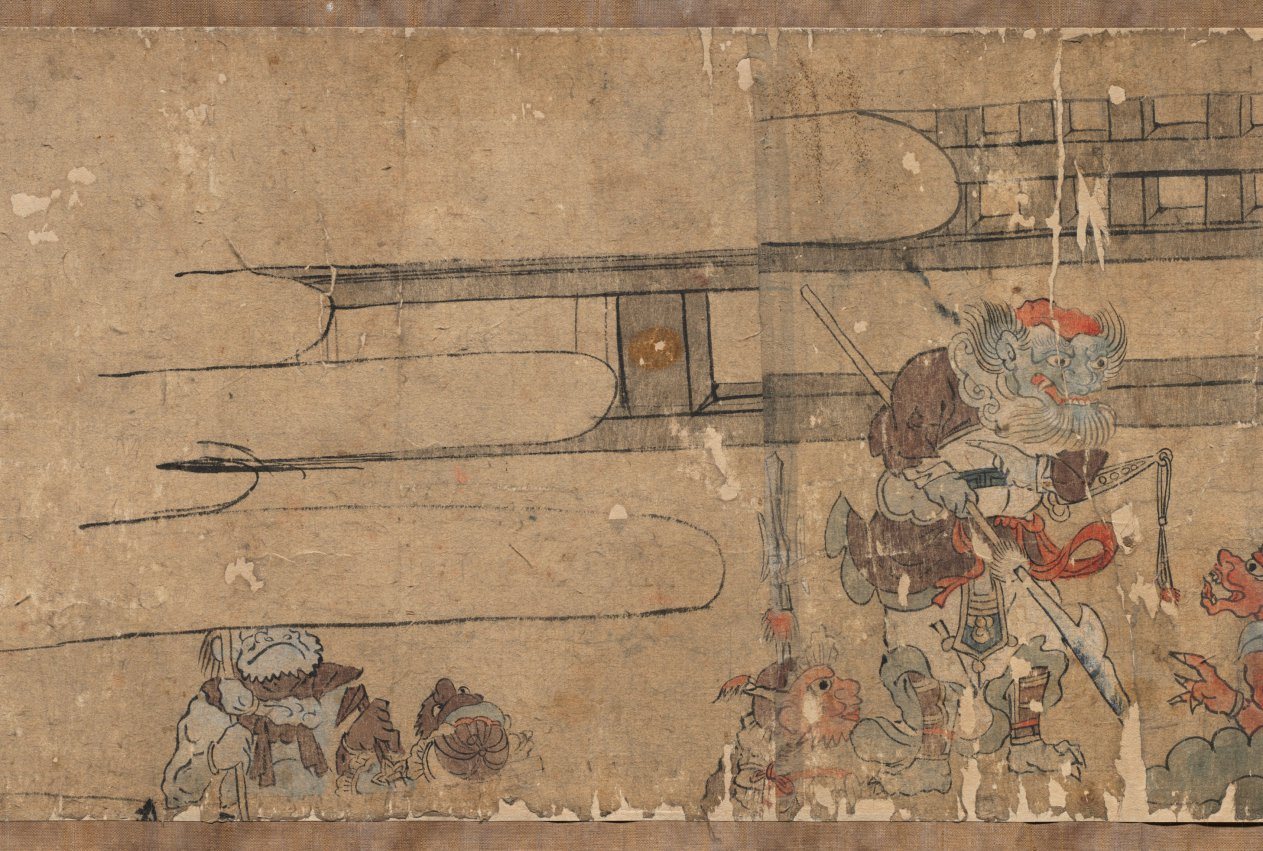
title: Oeyama Engi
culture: Japan, Edo period (1615–1868)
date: 1615–1868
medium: one of a pair of handscrolls; ink and color on paper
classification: Painting